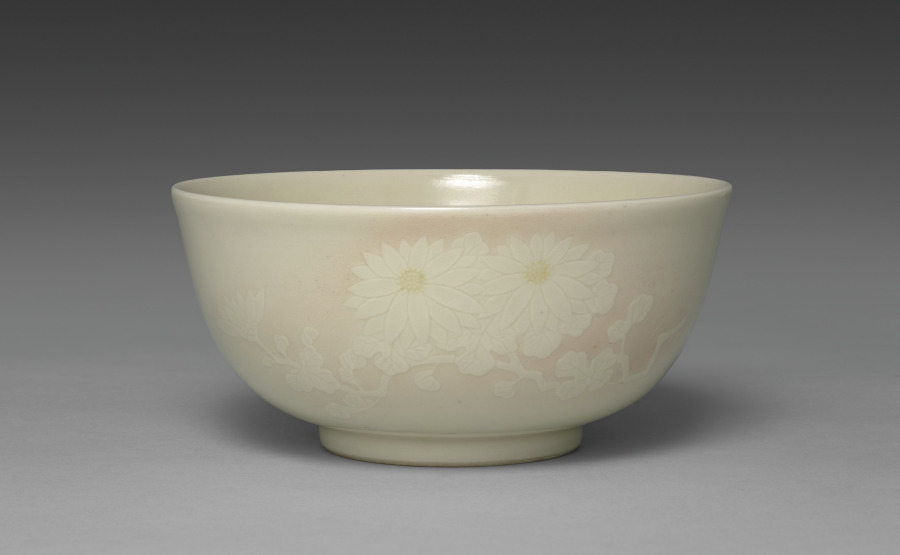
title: Sweets Bowl with Chrysanthemums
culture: Japan, Taishō period (1912–26) or Shōwa period (1926–89)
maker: Seifū Yohei IV (Japanese, 1872–1951)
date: 1914–46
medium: Porcelain with molded and carved design, underglaze color, and cream glaze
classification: Ceramic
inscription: 清風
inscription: 成山清風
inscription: 清風造 【印】 清風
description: Sweets bowls hold the confections enjoyed when drinking tea. This bowl and CMA 2022.206 offer an important lesson in appreciating Yohei IV’s ceramic practice. While they have the same design and shape and are made with the same materials, the execution of the pieces makes them entirely different after close inspection, thereby demonstrating the range of possible production results from a single template. Each bowl has the same composition of two different types of chrysanthemum flowers, one with long, slim, knifelike petals and the other with short, rounded, multilayered petals, shown running around its surface in low relief. The centers of the flowers are painted with yellow under the glaze. Yohei III formulated a number of new underglaze colors during his career, and this is likely one of them. For both bowls here, Yohei IV used his father’s kanpakuji formula, with underglaze pink for the gradated wash of color surrounding the flowers. The storage box lid provides abbreviated descriptions of the complex processes used in the surface decorations. It identifies the bowl as “Sweets dish with carved picture of chrysanthemum in kanpakuji.” The box has Yohei IV’s signature on the lid’s exterior, along with a seal reading “Seizan Seifu” 成山清風. The ink inscriptions are done in an elegant semiformal calligraphy. This bowl is more subtle and smooth in both the effect of the glaze and the execution of the relief. The designs are centered on the body between rim and foot. A closer look at the delineation of the flower petals reveals that the designs differ at times with respect to which petals appear in front or behind others. The centers of the bases of both bowls are incised with “Seifu” in a manner matching many other works by Yohei IV, although there are slight differences. As one might expect from the other differences in the bowls, the characters on the base of this subtle bowl are gentler, finishing in a tapering out of the strokes. Those on the bold bowl, CMA 2022.206, end in triangular pinheads.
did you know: This ivory and pink bowl by Seifū Yohei IV show his father’s “bright-jewel white porcelain” technique.